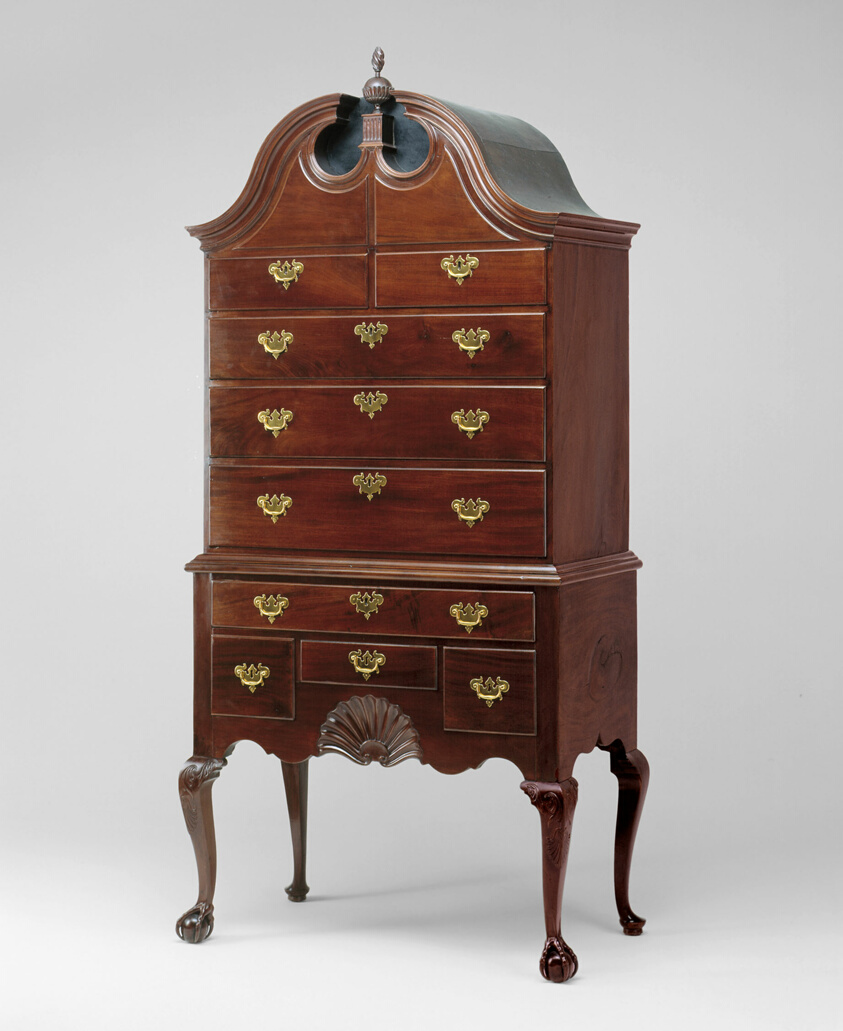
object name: Furniture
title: High Chest of Drawers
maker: Attributed to John Goddard; American, 1723–1785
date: 1755–85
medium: Mahogany with chestnut and white pine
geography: Newport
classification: case furniture; furniture; american decorative arts; american arts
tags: furniture